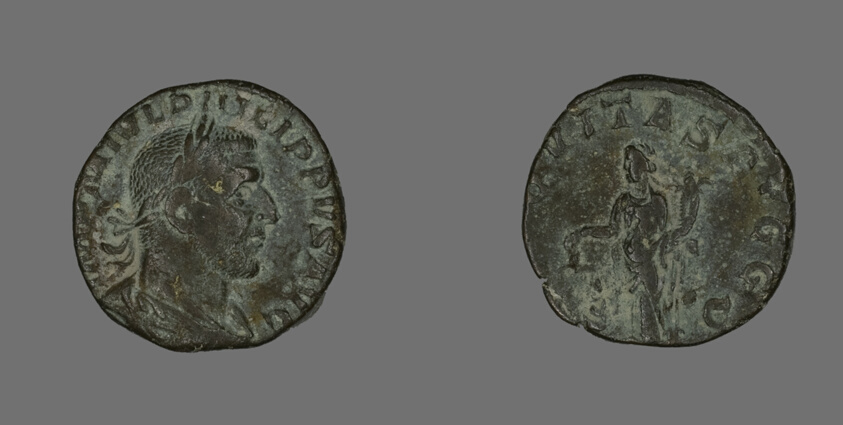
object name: Coin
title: Sestertius (Coin) Portraying Philip the Arab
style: roman (ancient, style or period), ancient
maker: Roman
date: 244-249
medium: Bronze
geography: Roman Empire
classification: coin; ancient art